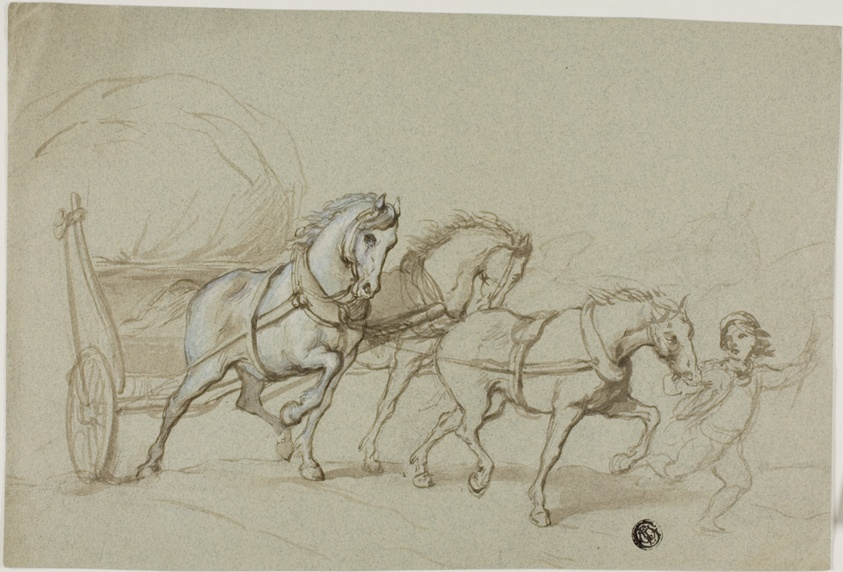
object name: Drawing and Watercolor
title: Child Leading Three Horses and Wagon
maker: Attributed to Thomas Stothard (English, 1755-1834); or possibly Frank Walter Taylor (American, 1874-1921)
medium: Brush and brown ink, heightened with blue and white gouache, on green wove paper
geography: England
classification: brush and wash; pen and ink drawings; drawings (visual works); prints and drawing